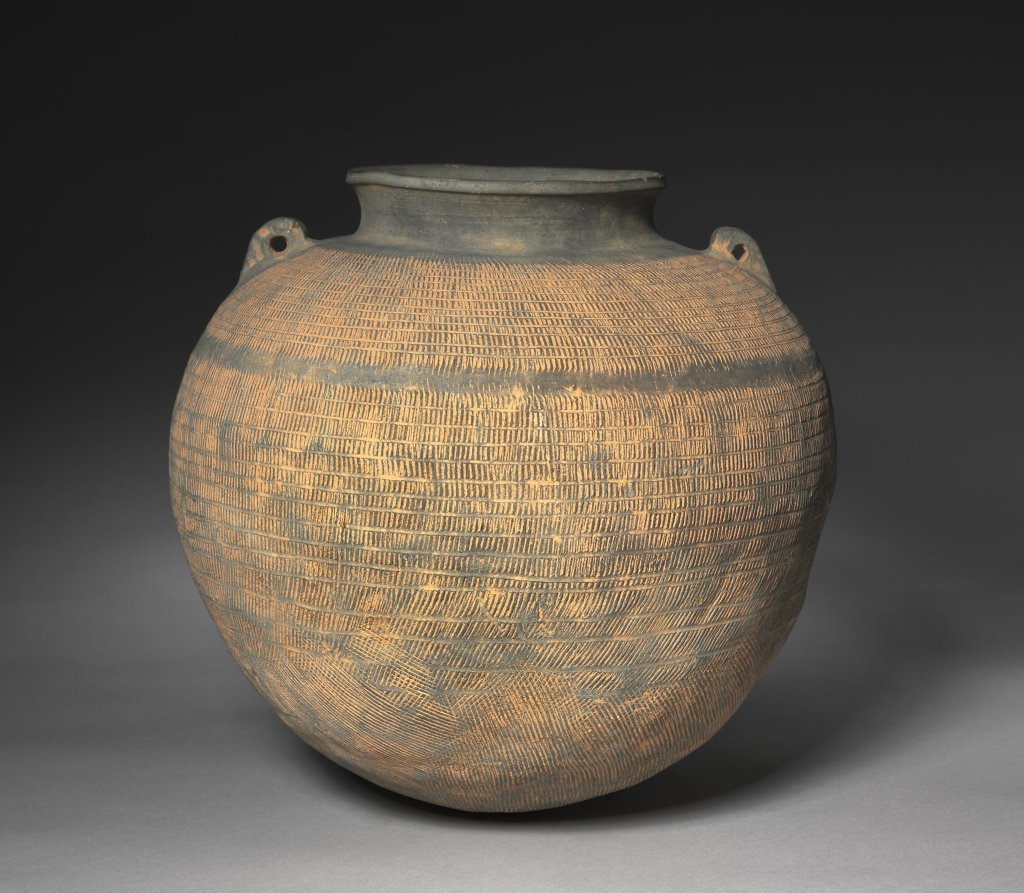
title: Storage Jar with Loop Handles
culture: Korea, Gaya period (42–562 CE)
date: 200s–300s CE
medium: earthenware with impressed and incised designs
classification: Ceramic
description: The function of this type of large jar remains unknown, yet it is highly likely that it was used to store harvested grains and seeds. The loops on its round shoulder suggest that the jar once had a lid fastened by cords, to strengthen its seal. Below its short neck, the vessel’s entire body is decorated with rows of short vertical and diagonal lines probably created by grooving and impressing the clay.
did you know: This large jar may have used to store harvested grains and seeds.